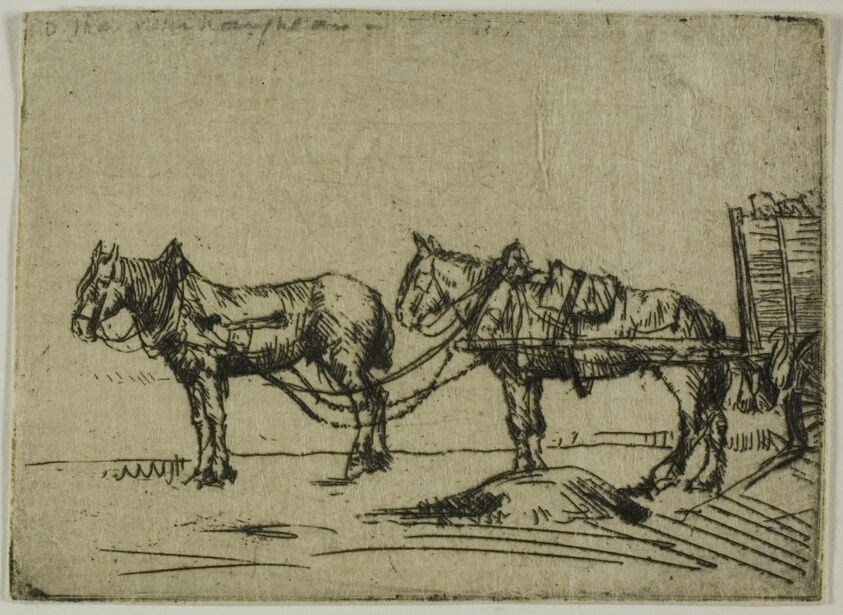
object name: Print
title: Two Horses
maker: Donald Shaw MacLaughlan (American, born Canada, 1876-1938)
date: 1906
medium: Etching in black on cream laid paper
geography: United States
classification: etching; print; prints and drawing